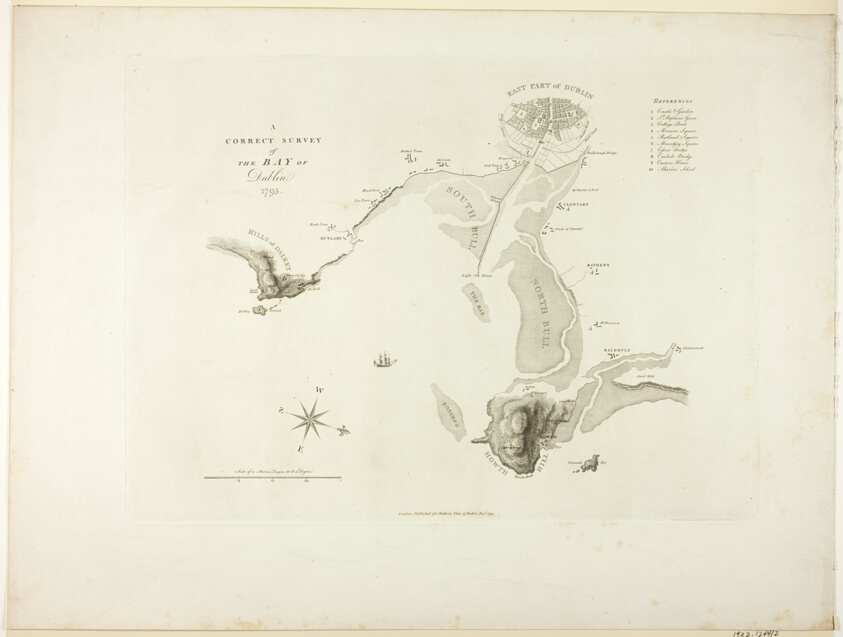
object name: Print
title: A Correct Survey of the Bay of Dublin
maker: James Malton (English, 1761-1803)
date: published December 1795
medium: Aquatint in black on ivory wove paper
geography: England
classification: aquatint; print; prints and drawing